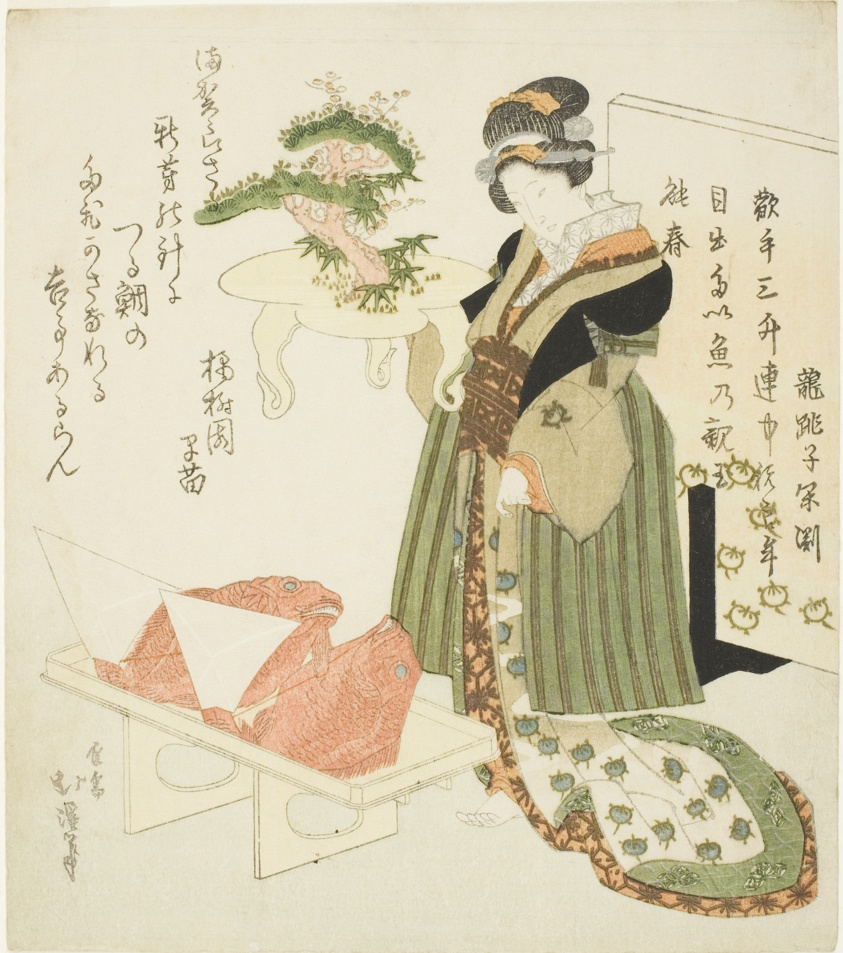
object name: Print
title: Courtesan carrying a decorated tray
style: Japanese (culture or style)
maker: Totoya Hokkei (Japanese, 1780-1850)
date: early to mid–1820s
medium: Color woodblock print; shikishiban, surimono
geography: Japan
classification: woodblock print; print; asian art